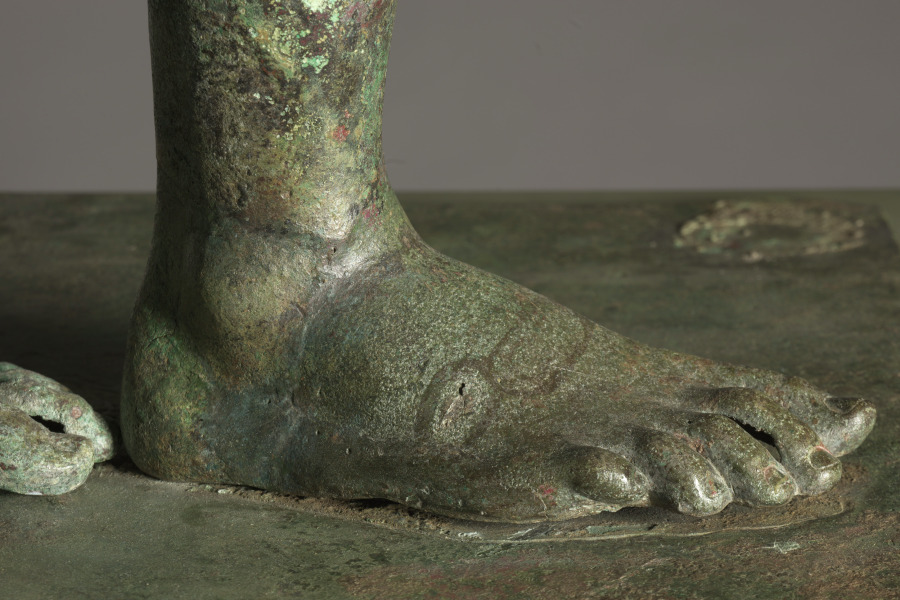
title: The Cleveland Apollo: Apollo Sauroktonos (Lizard-Slayer) or Apollo the Python-Slayer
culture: Greece, Athens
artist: attributed to Praxiteles (Greek, Athenian, c. 400–330 BCE)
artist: or Follower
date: c. 350–200 BCE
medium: bronze, copper and stone inlay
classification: Sculpture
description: The Cleveland Apollo was cast in multiple sections using the indirect lost-wax technique. First, molds were taken from a working model (now no longer known or preserved), which was then reproduced in hollow wax sections, each filled with a clay core. After details were added to the wax models, each was encased in clay. Then, the wax was heated, melted out, and replaced by molten bronze. Once cooled, the hollow bronze sections were fused together and finished, patching flaws and adding inlays and other details. Since the initial model was retained, it could be reused, allowing ancient sculptors to create multiples and variations of favorite works. Thus, remarkably, the Cleveland Apollo may once have been one of several such works. The consistently thin walls of the Cleveland Apollo (mostly 5-6 mm thick), together with the nearly invisible joins between most cast sections, show that it was created by highly skilled sculptors and foundry workers. Close looking reveals several noteworthy features. First, ovals atop the right foot mark a fusion weld, where molten bronze pooled to join separately cast sections. Second, small rectangular bronze patches cover parts of the surface (especially the right hip), each carefully cut and then hammered into place over holes or other casting defects. Inlaid lips, nipples, and eyes (the right ancient stone, the left now a modern replacement) added to the lifelike appearance of the sculpture, contrasting with the once bronze-colored skin. Finally, radiography helps to illuminate hidden features, such as the cast edge of the neck of Apollo.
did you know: Ovals across the top of the right foot show a clear join between separately cast sections.